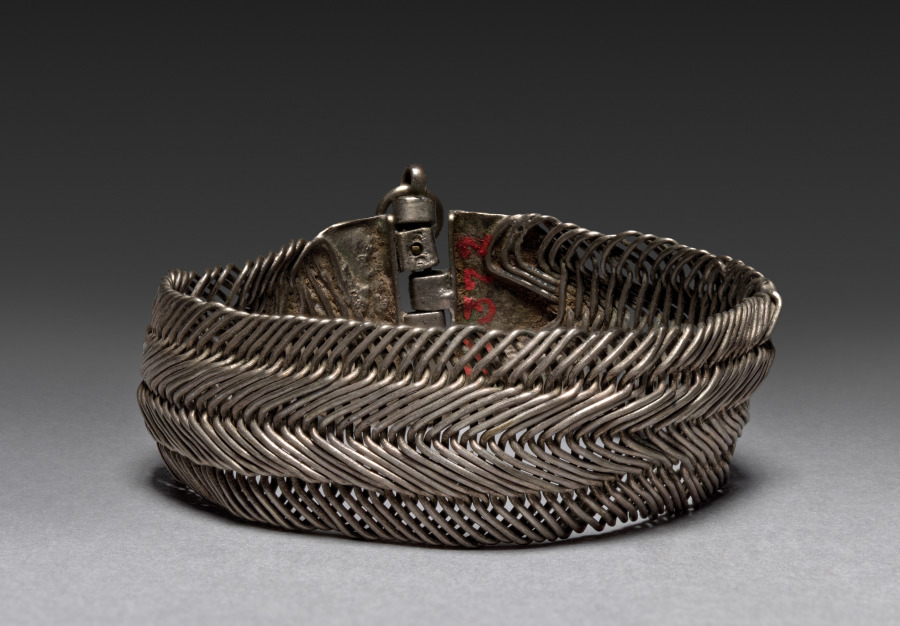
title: Bracelet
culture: Bulgaria, 18th-19th century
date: 1700s-1800s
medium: silver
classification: Jewelry